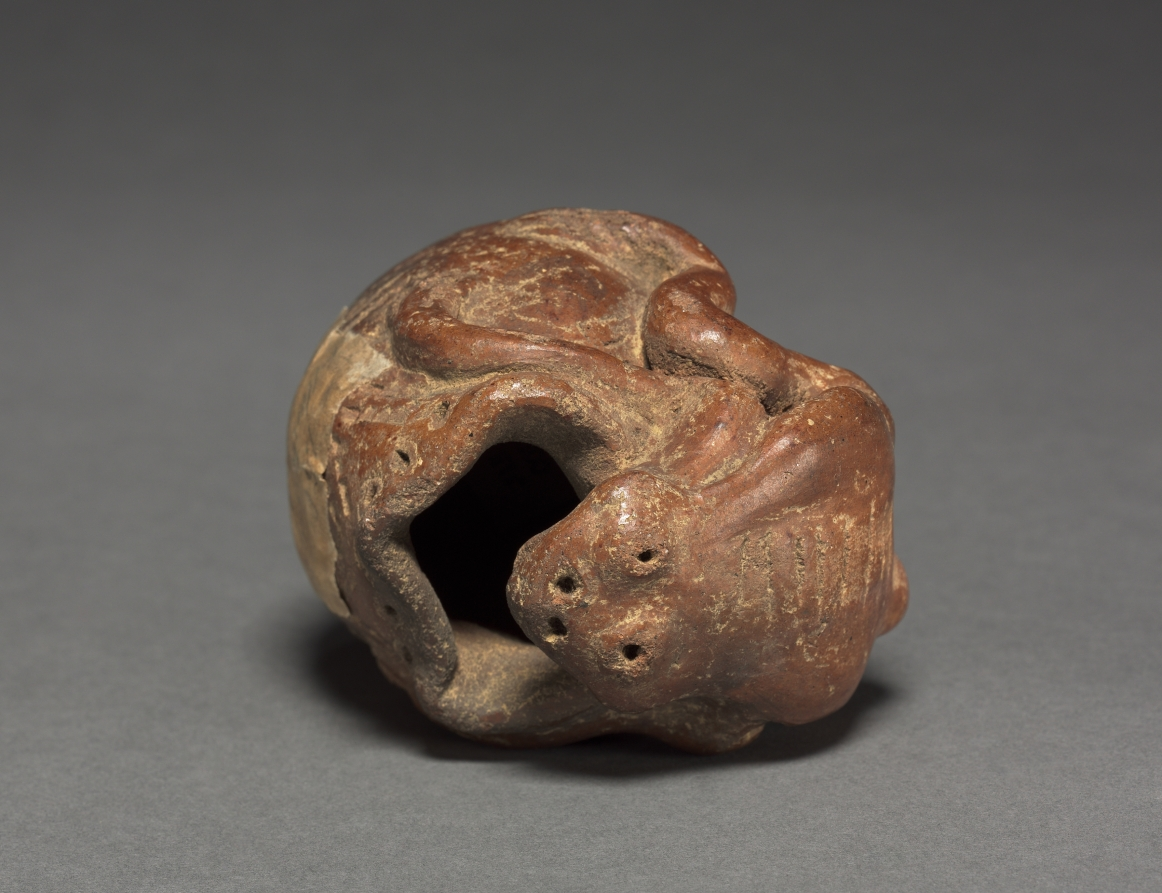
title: Jar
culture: Colombia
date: before 1921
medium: red ware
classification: Ceramic